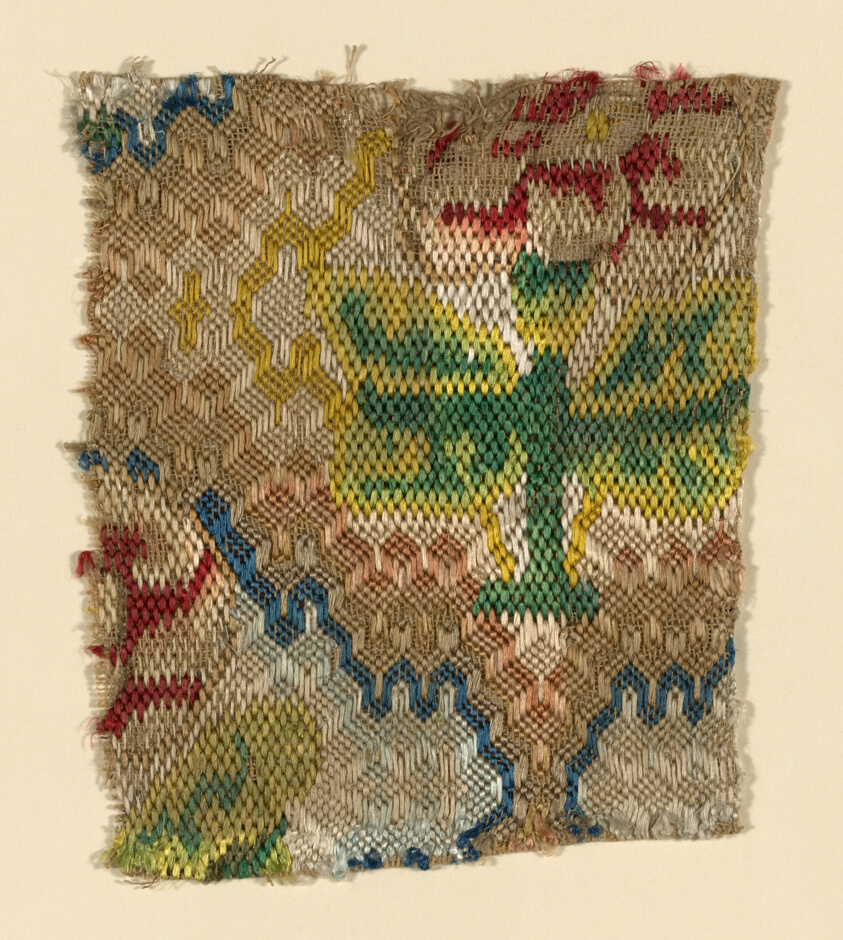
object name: Textile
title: Fragment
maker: Italy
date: 17th century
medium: Linen, plain weave; embroidered with silk floss in threadcounted technique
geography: Italy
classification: textile; weaving; needlework (visual works)